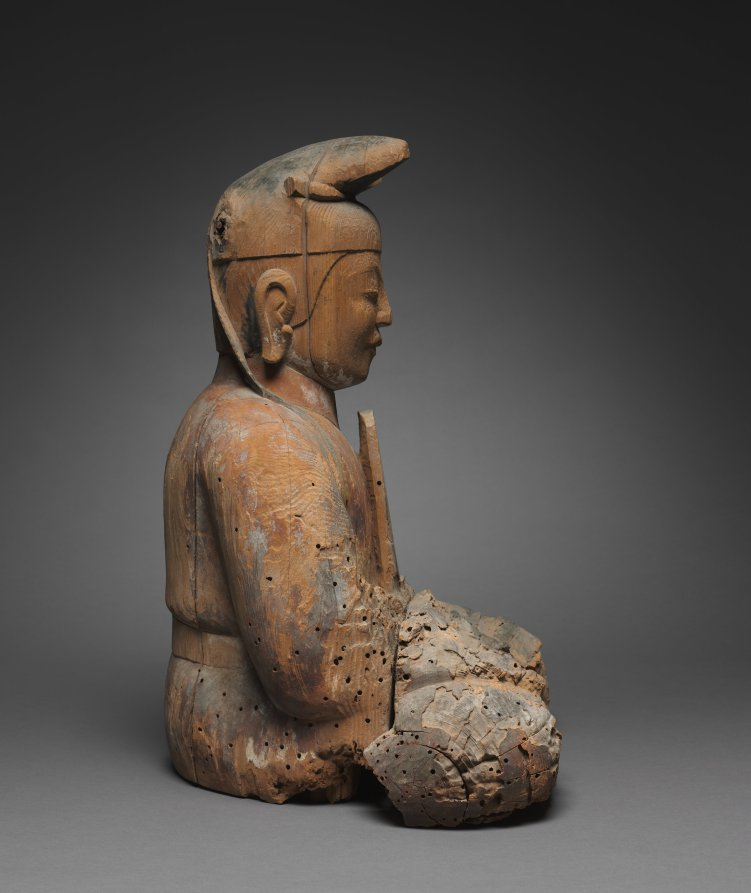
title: Shinto Deity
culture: Japan, Heian period (794–1185)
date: 900s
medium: wood, with traces of polychromy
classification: Sculpture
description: These sculptures represent kami, the name for deities associated with the Japanese religious tradition known as Shinto. They are said to have originally been created for the Usa Hachiman shrine in Oita on the island of Kyushu. Usa Hachiman Shrine houses four main kami: Hime Okami, who assists those engaged in agriculture and sea travel; the legendary 5th-century emperor Ojin deified as the kami Hachiman; Empress Jingu; and the kami of Mount Kawara, who aids copper miners. The identities of these two figures are unknown, but they belong to a larger group containing at least three other deities.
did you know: Traces of pigment on the surface of this sculpture indicate it was once painted.